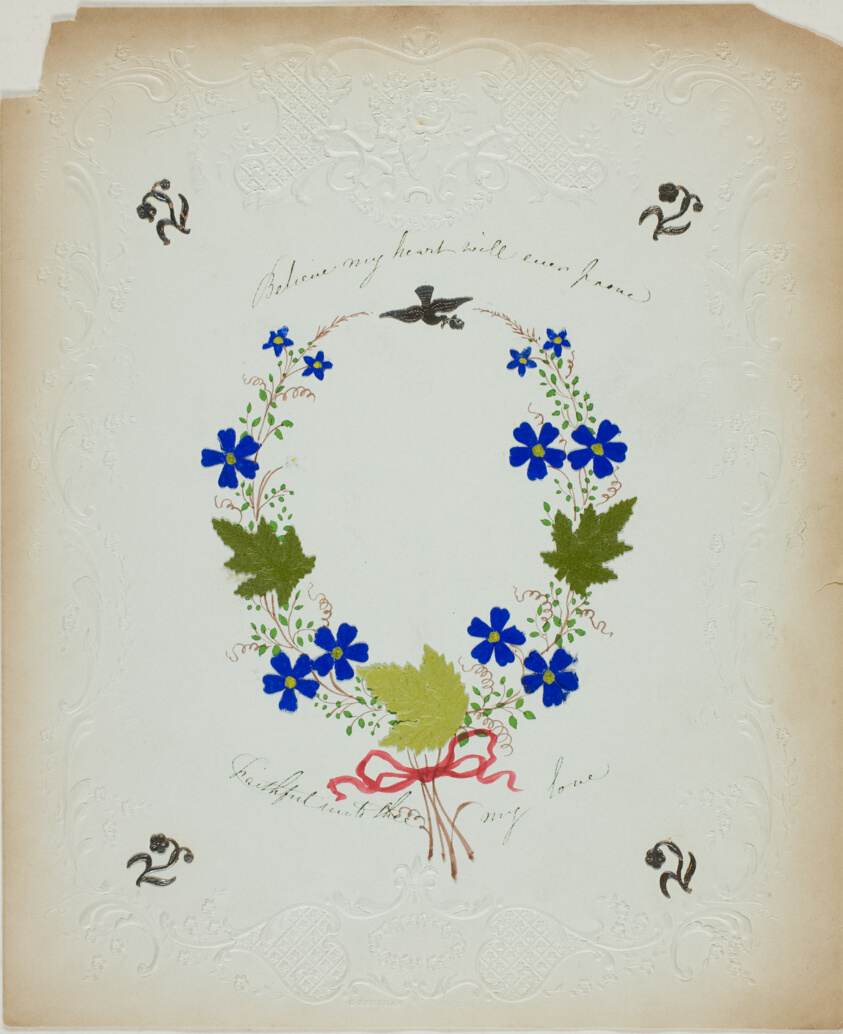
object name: Drawing and Watercolor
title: Believe My Heart Will Ever Prove (valentine)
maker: George Kershaw (English, 19th century)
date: c. 1840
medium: Collaged elements and watercolor, with pen and black ink on embossed off-white wove paper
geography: England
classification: valentine; prints and drawing; paper